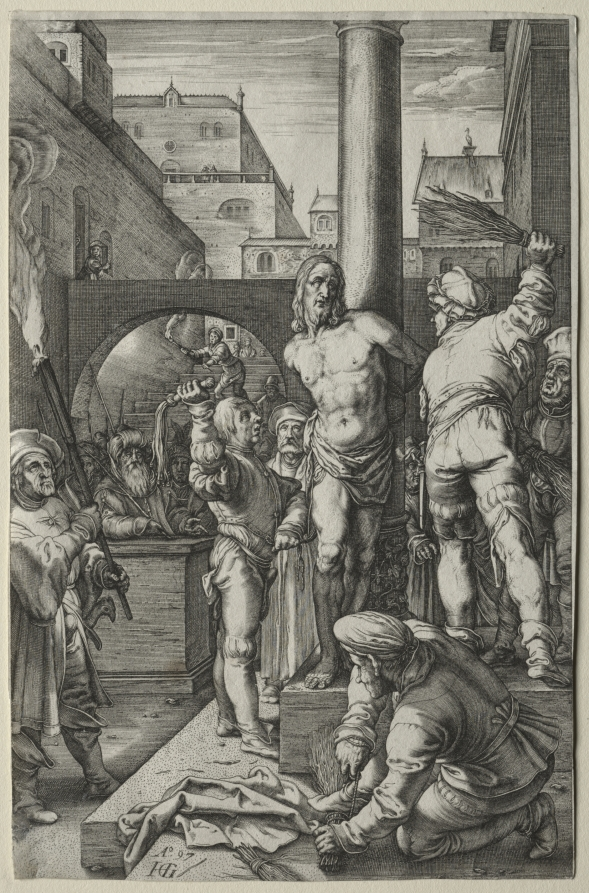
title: The Passion: The Flagellation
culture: Netherlands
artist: Hendrick Goltzius (Dutch, 1558–1617)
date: 1597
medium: engraving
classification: Print